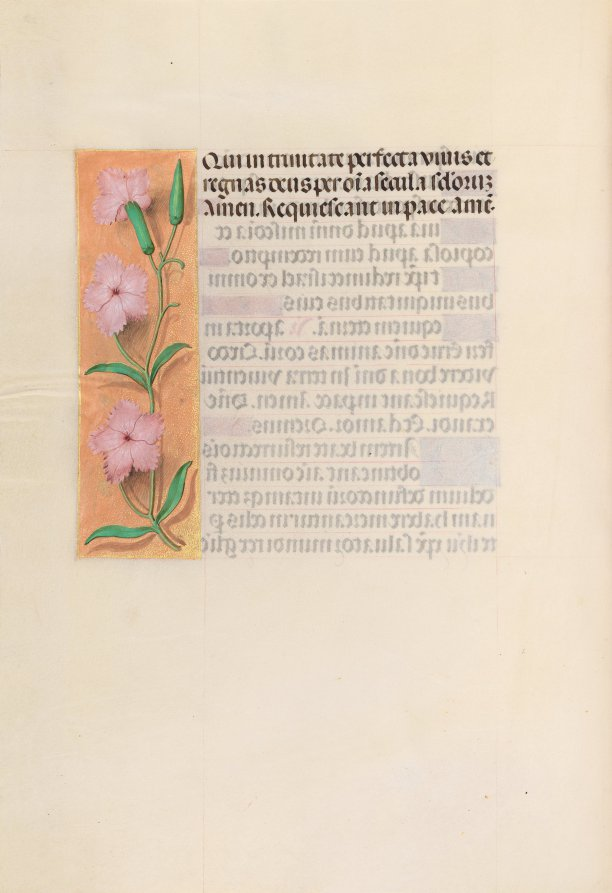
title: Hours of Queen Isabella the Catholic, Queen of Spain: Fol. 256v, Virgin and Child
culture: Flanders, Ghent and Bruges, late 15th century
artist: Master of the First Prayerbook of Maximillian (Flemish, c. 1444–1519)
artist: and Associates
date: c. 1500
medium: ink, tempera, and gold on vellum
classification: Bound Volume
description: This manuscript was illuminated by a circle of at least five highly organized manuscript painters active in the Flemish cities of Ghent and Bruges. The principal illuminator was Alexander Bening, who painted the majority of the book's miniatures. Manuscripts produced by this circle of artists are renowned for the decoration of their borders, which typically feature a rich variety of realistically-painted flowers, birds, and butterflies. This prayer book, called a book of hours, was intended not for a cleric, but for the private devotions of a lay person-in this case, Isabella the Catholic, Queen of Spain (1451-1504). Isabella's coat of arms embellishes the book's frontispiece. It is unlikely that the book was commissioned by the Queen herself; rather, she probably received it as a diplomatic gift from someone courting her patronage, perhaps Cardinal Francisco Jimenez de Cisneros. A Franciscan friar, Jimenez was dependent upon Isabella for his advancement, first to the post of Queen's confessor in 1492, and then to Archbishop of Toledo in 1495.